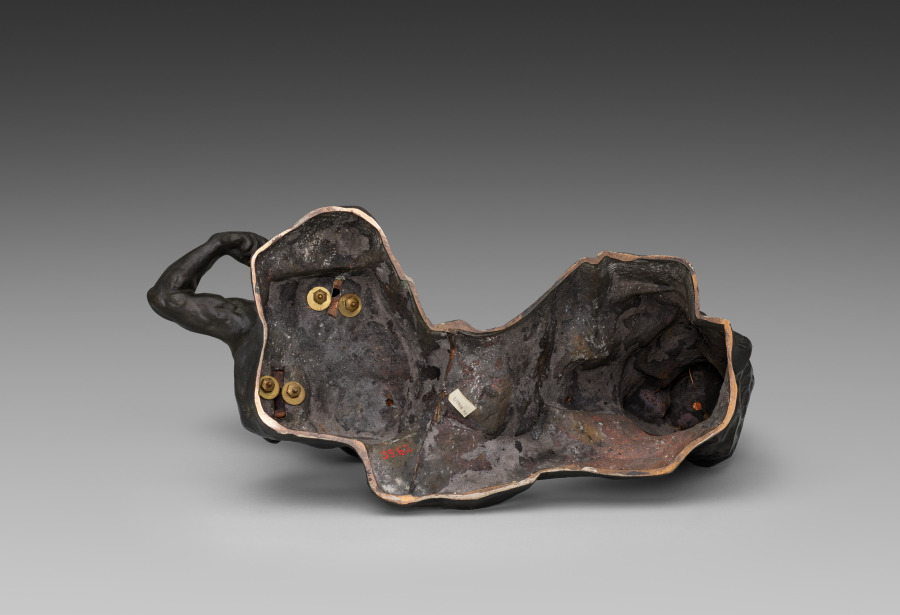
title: Herakles the Archer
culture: France, 19th century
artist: Emile Antoine Bourdelle (French, 1861–1929)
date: 1908–9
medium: bronze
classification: Sculpture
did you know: The model who posed for this sculpture was Major Paul Gustave André Doyen-Parigot, an accomplished sportsman and military commander, who was later killed during World War I in the Battle of Verdun.